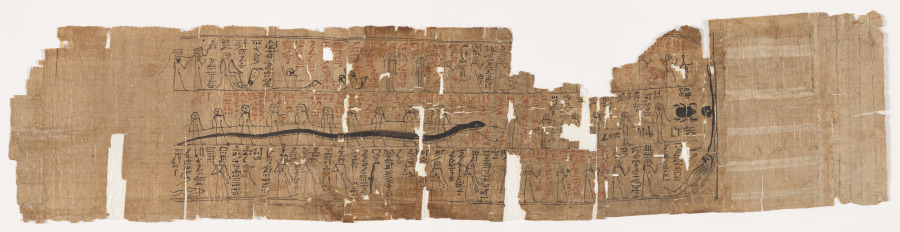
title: Book of Amduat, Perhaps of Bakenmut, with Elements of the Tenth through Twelfth Hours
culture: Egypt, Third Intermediate (1069–715 BCE), Dynasties 21–22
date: 1000–900 BCE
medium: papyrus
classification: Funerary Equipment